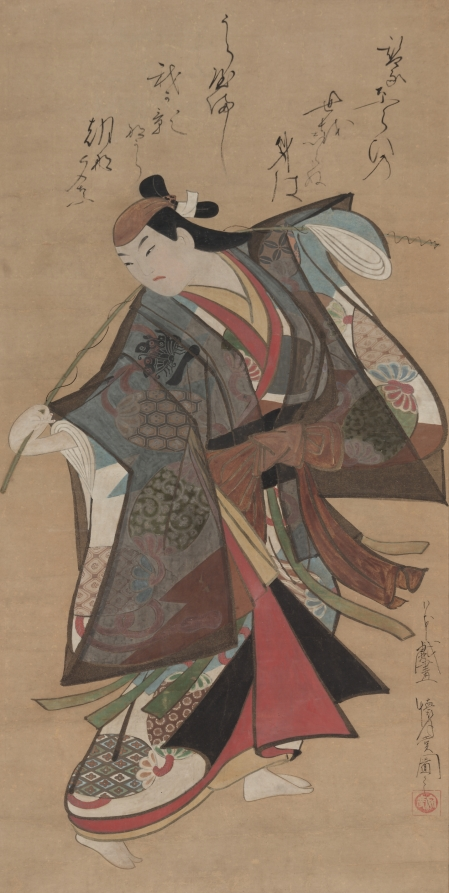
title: Sanjo Kantaro II in the Role of Urashima Taro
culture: Japan, Edo period (1615–1868)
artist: Kaigetsudō Ando (Japanese, c. 1671–1743)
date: early 1700s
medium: hanging scroll; ink and color on paper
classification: Painting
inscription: Nihon giga Kaigetsudō Ando kore [o] zu [su]. 【印】 安度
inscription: 31-syllable waka poem inscribed on the upper portion of the painting.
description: Sanjo Kantaro II was a Kabuki actor who specialized in playing youths (wakashu) and female roles (onnagata). He is shown here in the role of Urashima Taro. He rescues a tortoise, and as a reward, the tortoise carries him to the undersea palace of the Dragon King. He believes he has spent but three days there with the Dragon King's daughter; however, when he returns to the shore, he finds 300 years have passed. The actor holds a fishing pole, indicating his occupation as a fisherman. The upper portion of the painting contains a 31-syllable waka poem.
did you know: The hexagonal design on the actor's robe represents the patterning of a tortoise’s carapace.